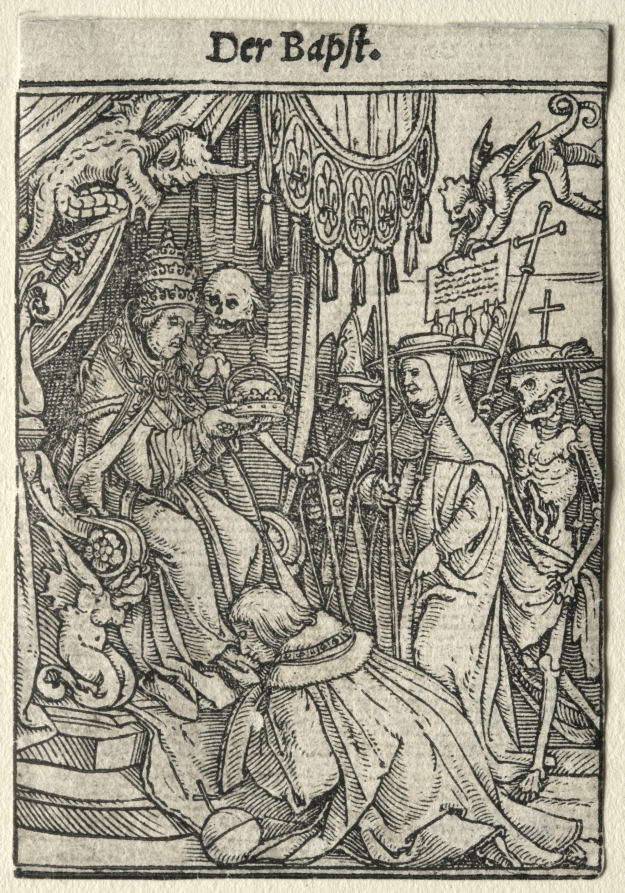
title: Dance of Death: The Pope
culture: Germany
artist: Hans Holbein the Younger (German, active England and Switzerland, 1497/98–1543)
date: c. 1526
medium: woodcut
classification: Print